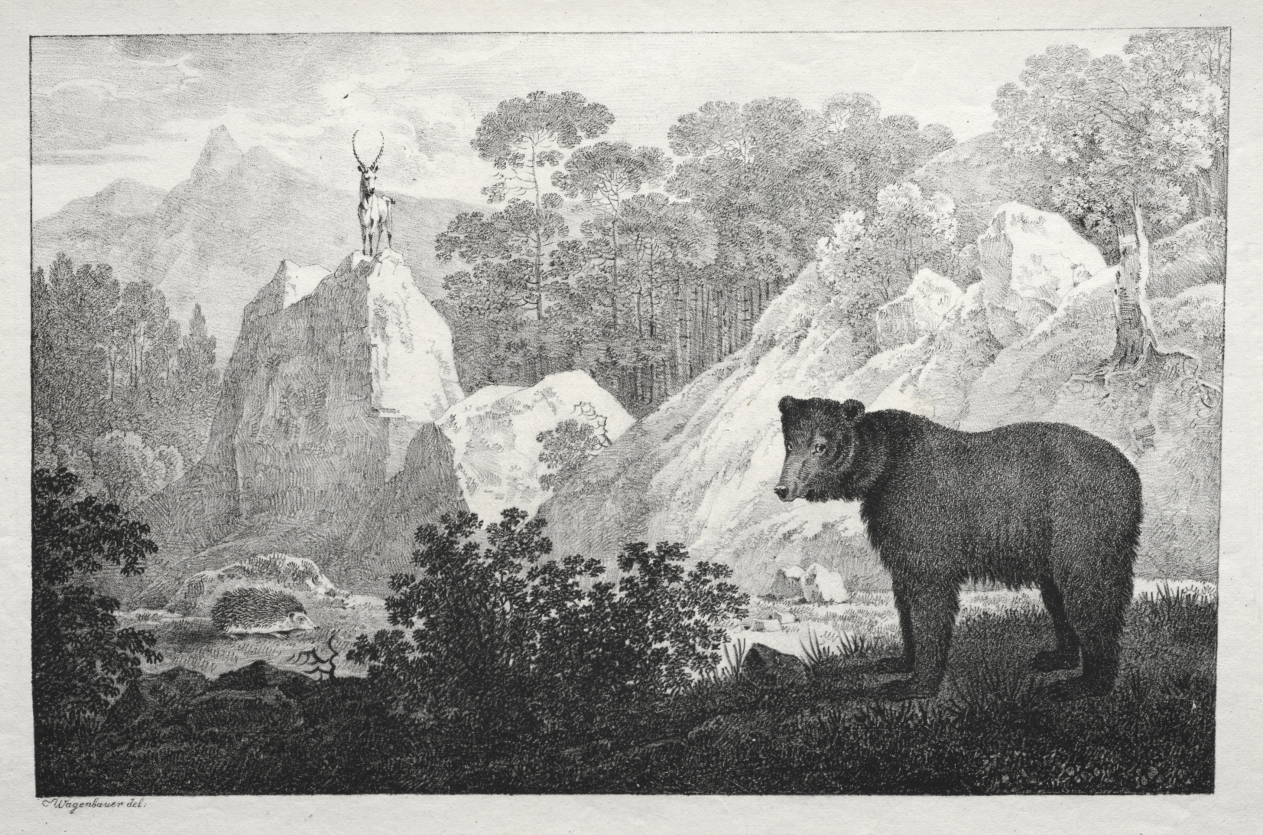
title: Mountainous Landscape with Bear in the Foreground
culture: Germany, 19th century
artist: Maximilian Josef Wagenbauer (German, 1774–1829)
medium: lithograph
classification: Print